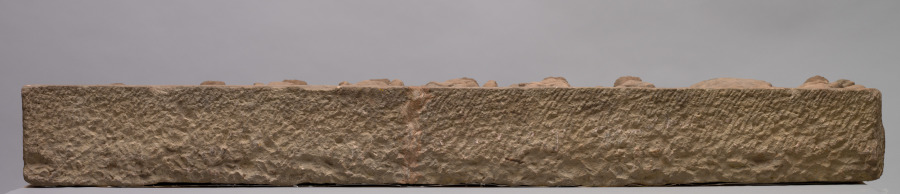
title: Nine Celestial Bodies (Navagraha)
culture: Central India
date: 700s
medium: Sandstone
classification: Sculpture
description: Near temple entrances, the nine celestial bodies were depicted in an orderly row, often in figural form. From left to right they are: Sun with a tall crown and the female Dawn in front of him. The next five figures are nearly identical: Moon, Mercury, Venus, Mars, and Jupiter. As a portent of doom, Saturn was wounded by a goddess to prevent him from moving swiftly, so he stands on one leg. The bodiless head is Rahu, the eclipse, who swallows the moon until it falls out his neck. The serpent-tailed figure is a comet.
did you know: The Sun (Surya) is the only figure who wears boots and holds fully open lotus flowers.